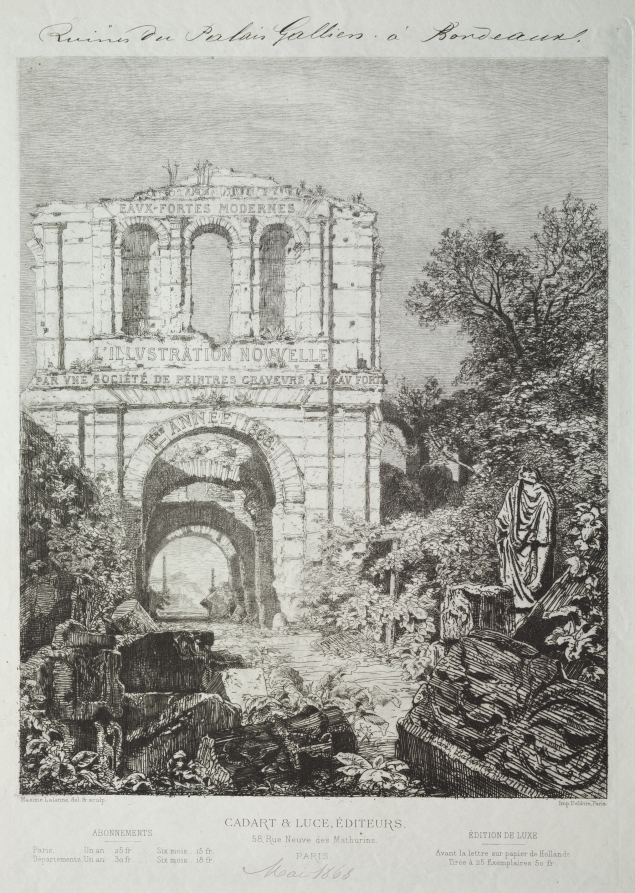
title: Ruins of the Gallien Palace in Bordeaux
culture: France, 19th century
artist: Maxime Lalanne (French, 1827–1886)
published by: Cadart & Luce, Paris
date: 1866–68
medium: etching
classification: Print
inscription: top margin, in pen and black ink: Ruines du Palais Gallien à Bordeaux